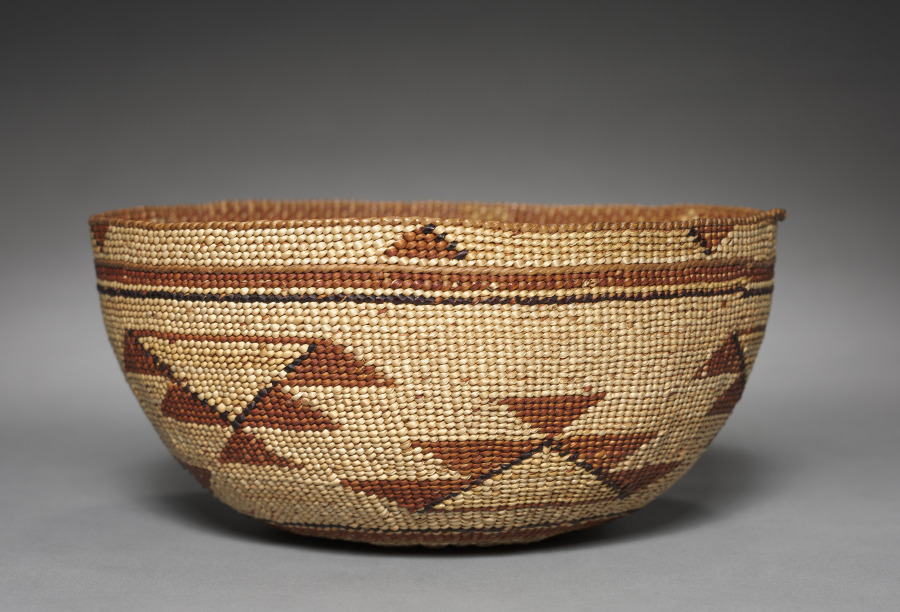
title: Hat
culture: California, late 19th- early 20th century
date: c 1875–1917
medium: plain-twined hazel with decoration in beargrass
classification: Basketry